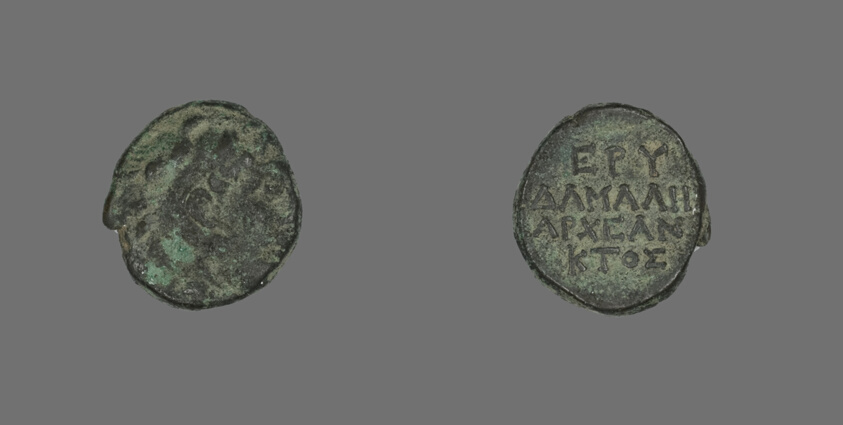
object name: Coin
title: Coin Depicting the Hero Herakles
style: greek, ancient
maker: Greek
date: about 300-200 BCE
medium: Bronze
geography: Ancient Greece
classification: coin; ancient art